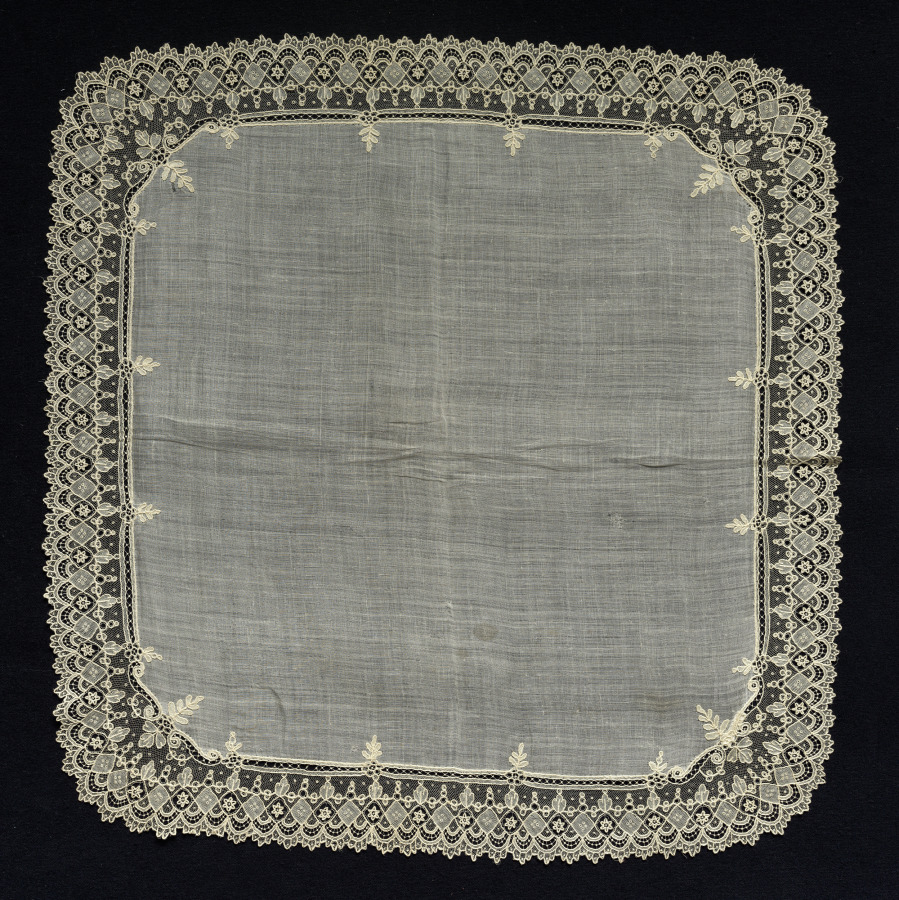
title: Lace Handkerchief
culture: Belgium, Brussels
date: 1800s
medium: Plain weave linen center; needle lace (point de gaze) border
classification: Lace